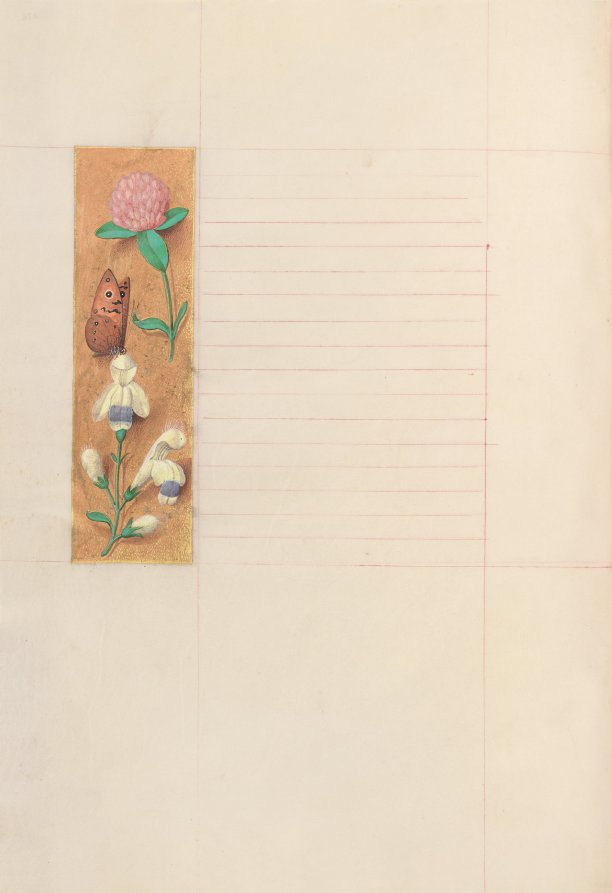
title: Hours of Queen Isabella the Catholic, Queen of Spain: Fol. 276v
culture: Flanders, Ghent and Bruges, late 15th century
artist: Master of the First Prayerbook of Maximillian (Flemish, c. 1444–1519)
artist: and Associates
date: c. 1500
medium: ink, tempera, and gold on vellum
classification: Bound Volume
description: This manuscript was illuminated by a circle of at least five highly organized manuscript painters active in the Flemish cities of Ghent and Bruges. The principal illuminator was Alexander Bening, who painted the majority of the book's miniatures. Manuscripts produced by this circle of artists are renowned for the decoration of their borders, which typically feature a rich variety of realistically-painted flowers, birds, and butterflies. This prayer book, called a book of hours, was intended not for a cleric, but for the private devotions of a lay person-in this case, Isabella the Catholic, Queen of Spain (1451-1504). Isabella's coat of arms embellishes the book's frontispiece. It is unlikely that the book was commissioned by the Queen herself; rather, she probably received it as a diplomatic gift from someone courting her patronage, perhaps Cardinal Francisco Jimenez de Cisneros. A Franciscan friar, Jimenez was dependent upon Isabella for his advancement, first to the post of Queen's confessor in 1492, and then to Archbishop of Toledo in 1495.